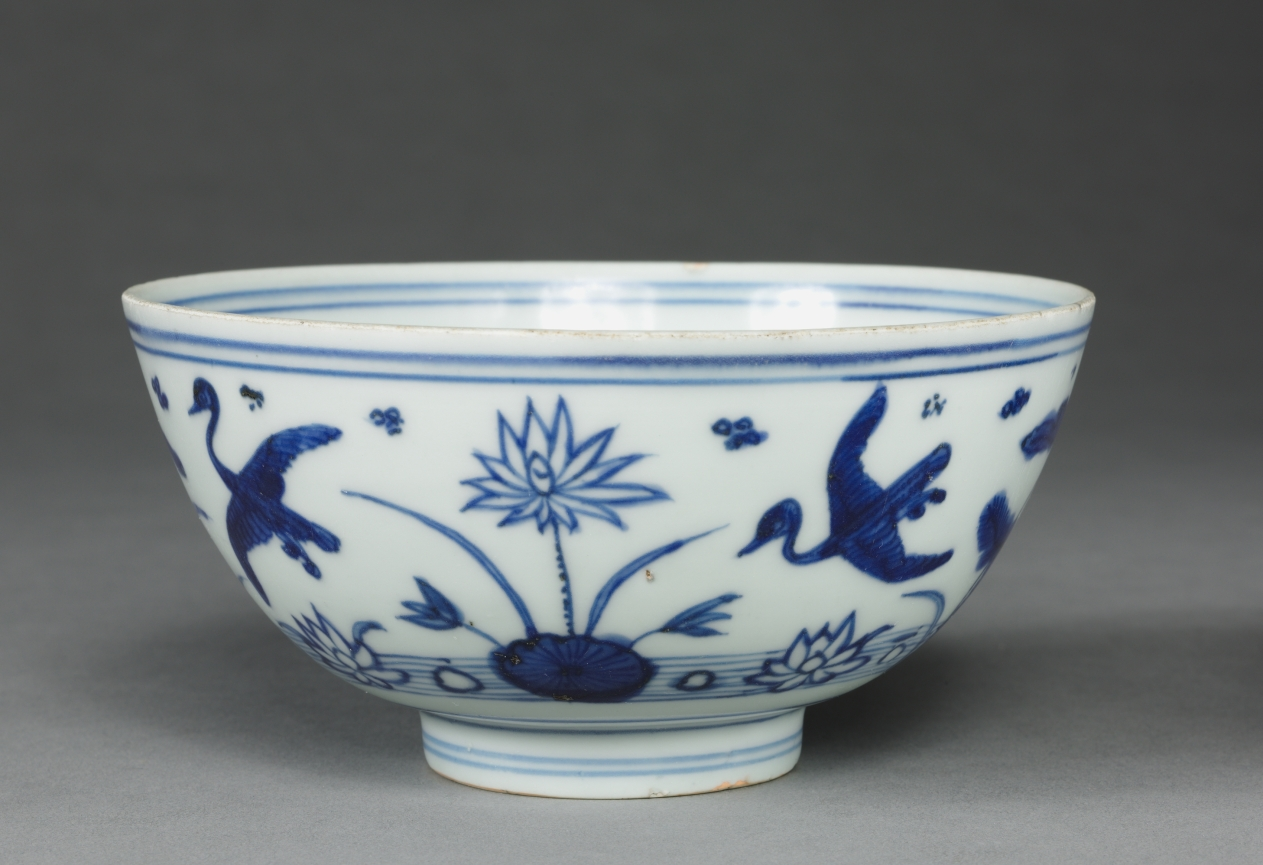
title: Bowl with Ducks over Lotus Pond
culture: China, Jiangxi province, Jingdezhen kilns, Ming dynasty (1368-1644), Wanli reign (1573-1620)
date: 1573–1620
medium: porcelain with underglaze blue decoration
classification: Ceramic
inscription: 永保長春